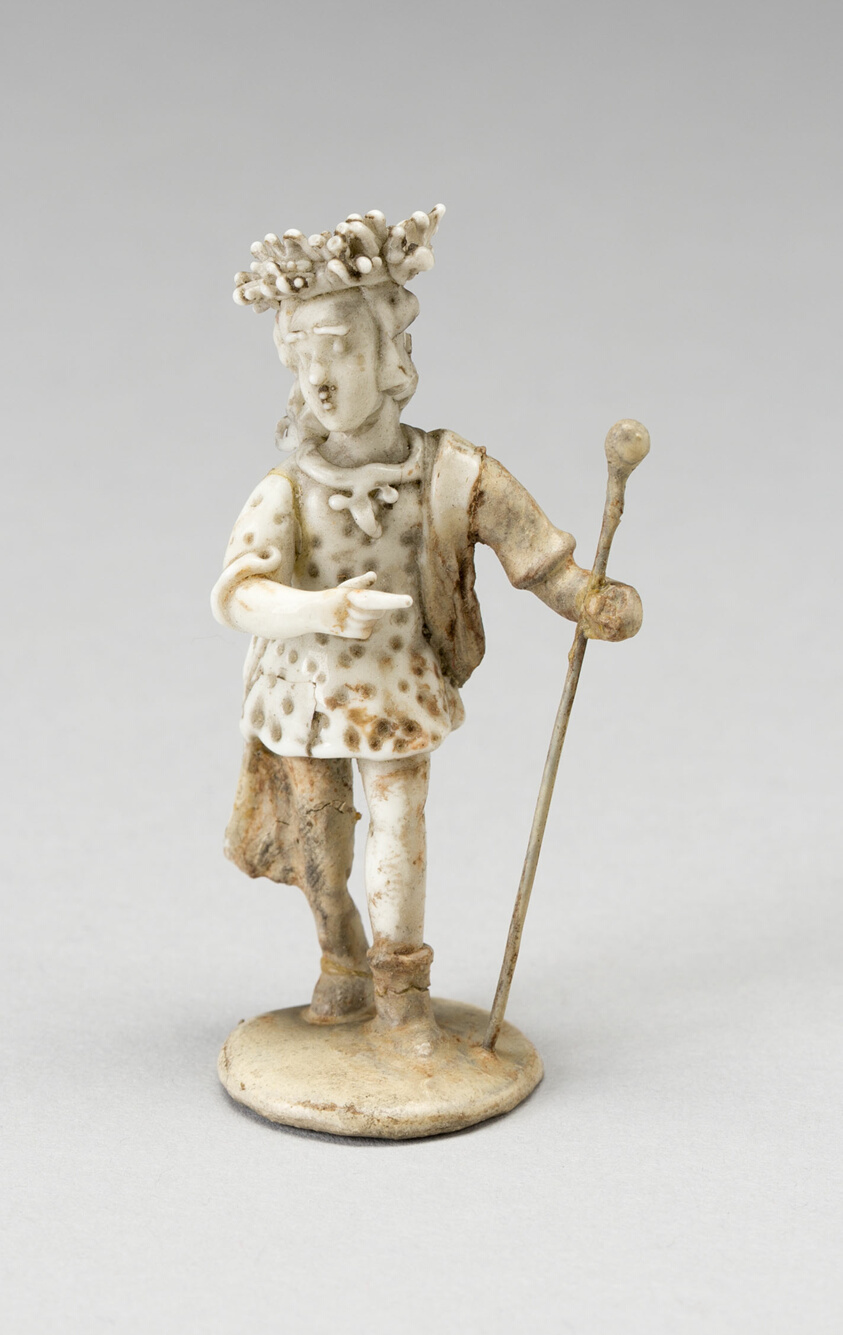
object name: Glass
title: Actor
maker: Nevers, France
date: Early 18th century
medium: Glass; lampwork (verre de Nevers), metal armature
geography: France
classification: decorative object/ornament; lampwork; glass; european decorative arts